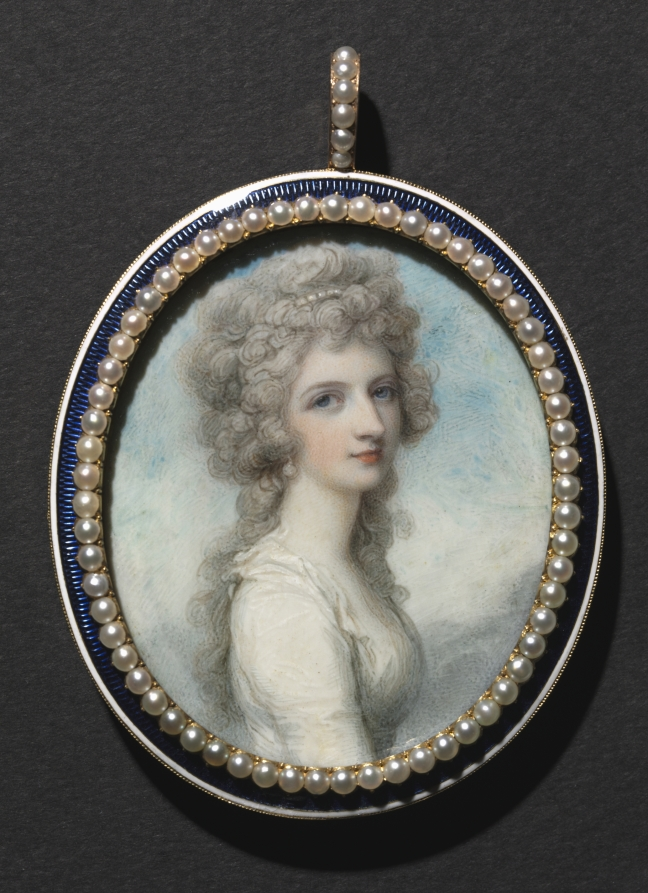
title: Portrait of Mary Frances (Fanny) Swinburne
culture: England, 18th century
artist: Richard Cosway (British, 1742–1821)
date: c. 1786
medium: watercolor on ivory in a gold, enamel, and split pearl frame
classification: Portrait Miniature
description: Mary Frances (Fanny) Swinburne (d. 1828) was the eldest daughter of the travel writer Henry Swinburne. This portrait was painted around 1786, when Richard Cosway was reaching the mature stage of his career and was among the most sought after miniature painters in London. In this work the sitter’s hair is adorned with pearls—a style commonly seen in portraits of the period. She wears an earring in her right ear. Her bright blue eyes, rosy cheeks, and red lips are accentuated by her mass of curled, powdered hair and her pale skin and gown. This work is a classic example of Cosway’s elegant female portraits, exhibiting the nearly monochromatic palette and free style that would be so decisively rejected in the next century by such artists as Andrew Robertson (1777–1845) and William Charles Ross (1794–1860). The miniature is placed in a twentieth-century revival period gold and blue enamel frame with graduated split pearls. This ornate type of frame was especially popular among early-twentieth-century collectors who felt that it suited the grandeur of miniatures by Cosway and his circle, the female portraits of which were so often composed of the pale tones of gauzy dresses, blue skies, and pearl-ornamented hair.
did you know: Richard Cosway painted Mary Frances’s parents, Henry and Martha, in the same year he painted this.